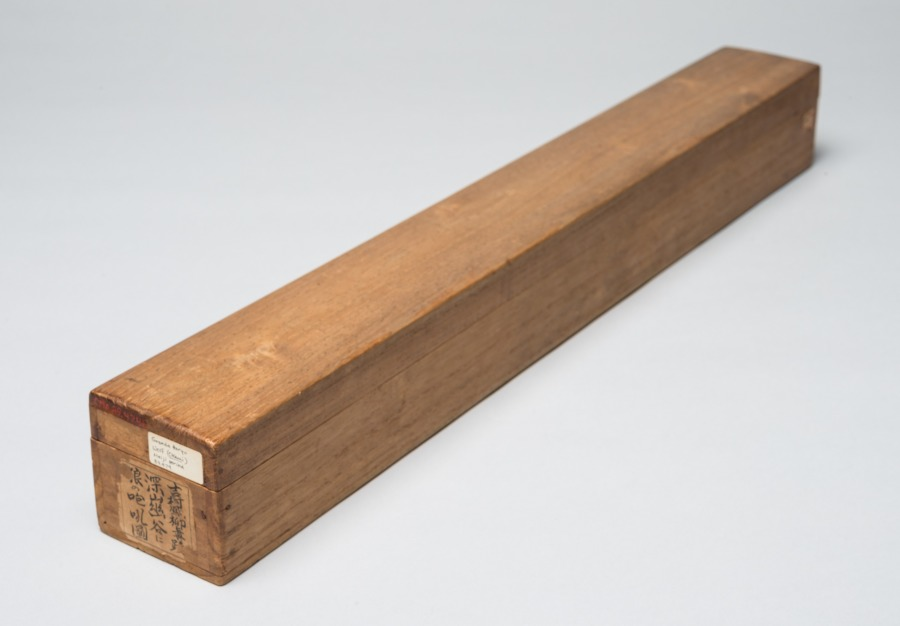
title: Howling Wolf in a Deep Mountain Valley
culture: Japan, Taishō period (1912–26)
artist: Yoshimura Hōryū (Japanese, 1874–1950)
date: 1912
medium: Hanging scroll; ink and color on silk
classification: Painting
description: A wolf howls beneath the tall pines in a misty landscape. The painter was born in the bustling city of Osaka in the Kansai region. He studied with Mori Jihō (1818–1891) and admired the Maruyama school of painters. He was especially gifted at depicting deer, monkeys, tigers, weasels, and other animals.